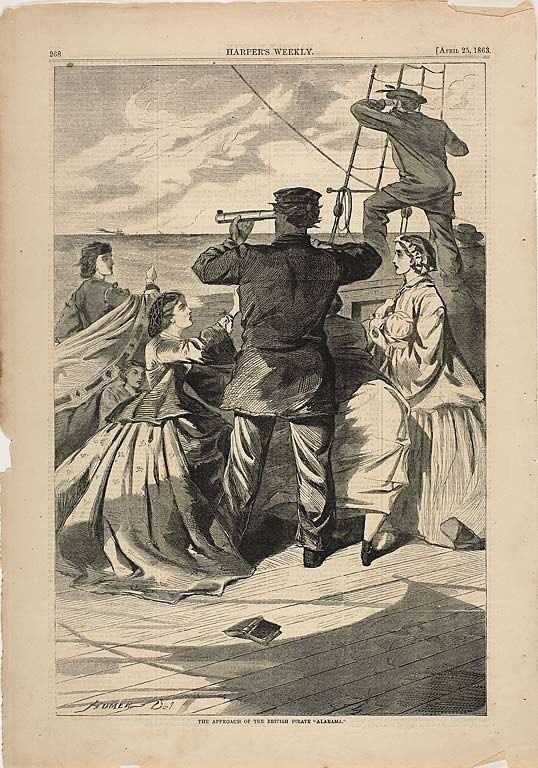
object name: Print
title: The Approach of the British Pirate "Alabama"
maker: Winslow Homer (American, 1836-1910); published by Harper's Weekly (American, 1857-1916)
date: published April 25, 1863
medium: Wood engraving on paper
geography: United States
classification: wood engraving; print; prints and drawing